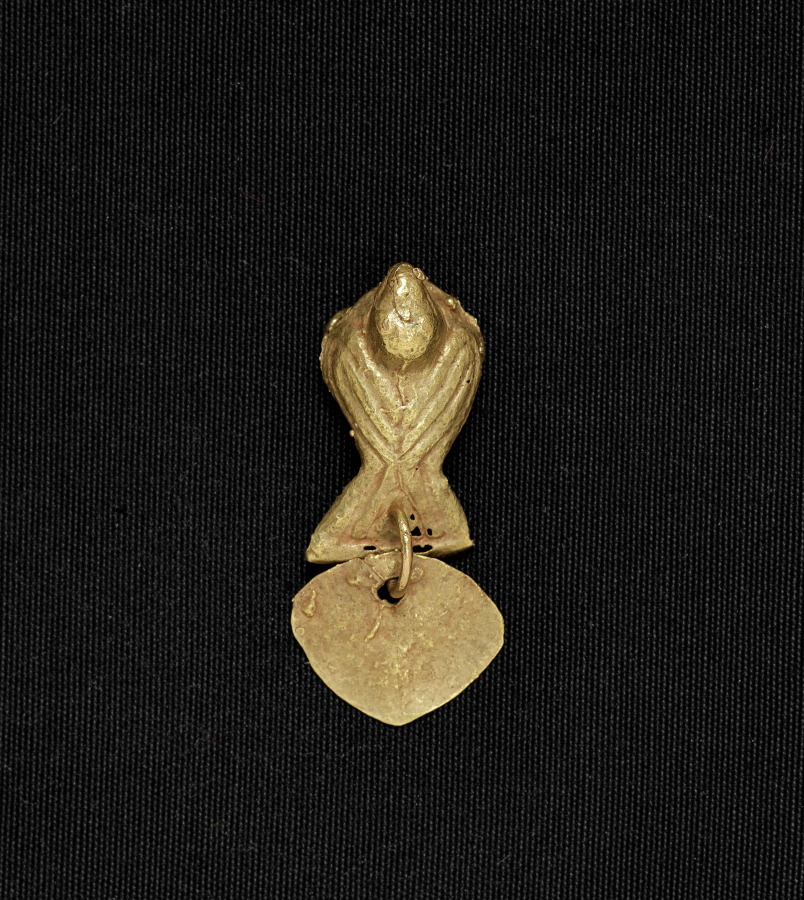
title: Bird Bead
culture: Colombia, Muisca style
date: c. 900–1550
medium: cast gold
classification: Jewelry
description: Muisca metalwork divides into two categories: ornaments to be worn, such as these, and offering figurines, in the case to the right. The elaborate bird pendant features delicate herringbone moldings, openwork patterns, and wing details-all part of the wax model from which the pendant was cast (see nearby computer animation). The dangles were attached after casting.